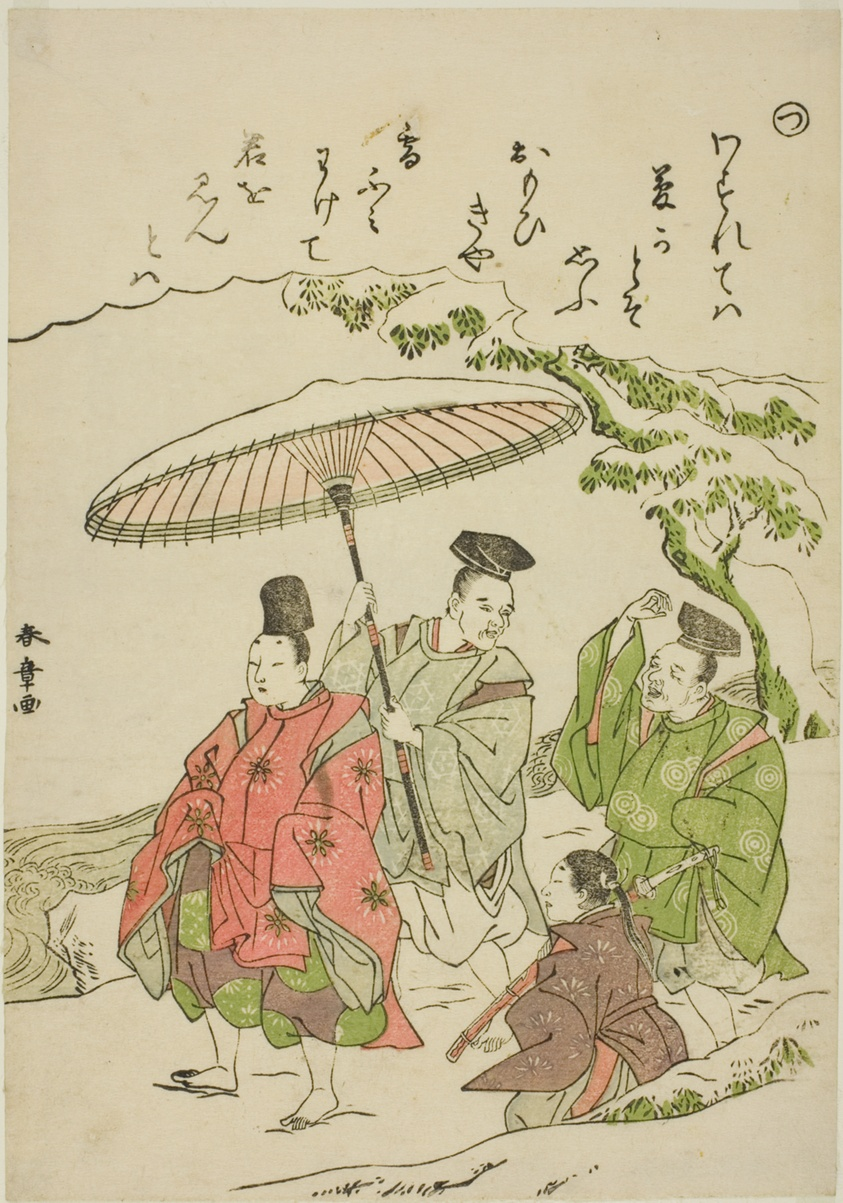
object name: Print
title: "Tsu": Narihira in the Snow at Ono, from the series "Tales of Ise in Fashionable Brocade Pictures (Furyu nishiki-e Ise monogatari)"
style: Japanese (culture or style)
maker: Katsukawa Shunsho 勝川 春章; Japanese, 1726-1792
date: c. 1772/73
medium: Color woodblock print; koban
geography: Japan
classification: woodblock print; print; asian art